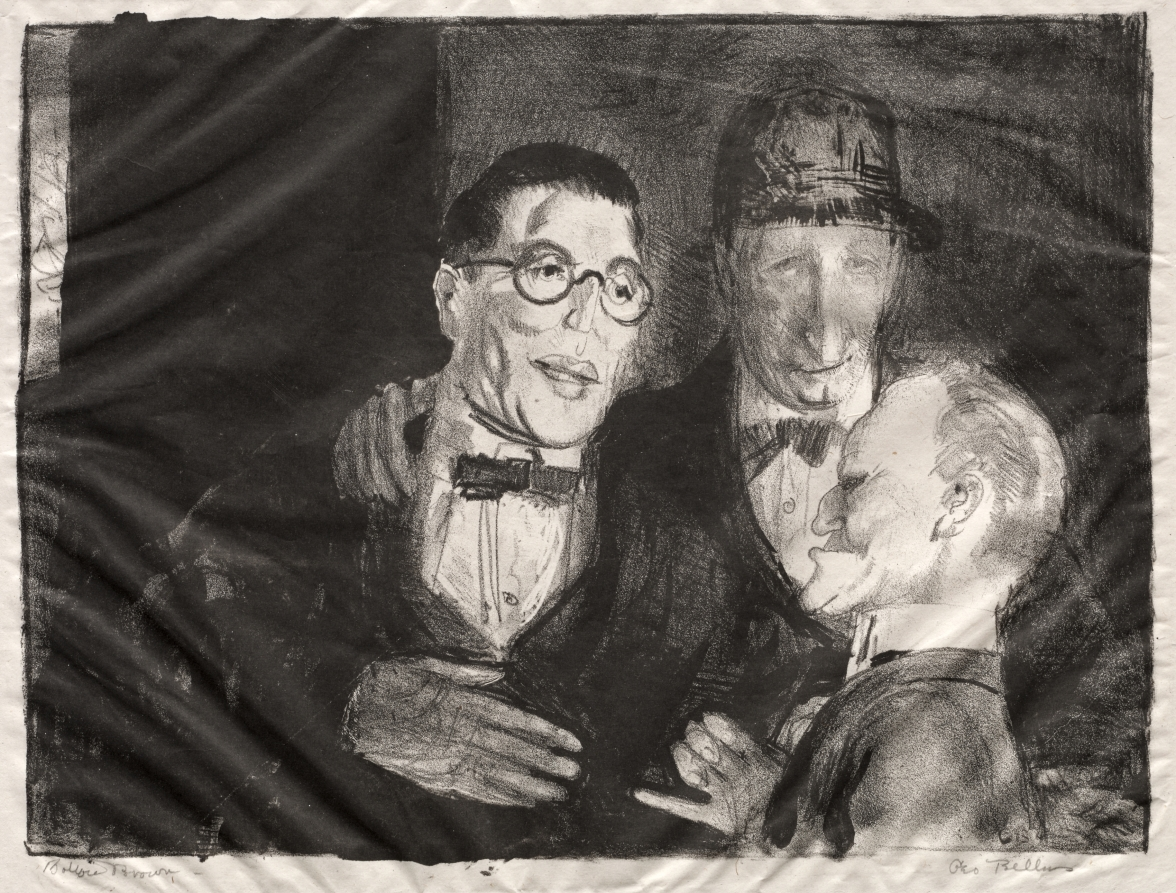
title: Speicher, Kroll and Bellows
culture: America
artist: George Bellows (American, 1882–1925)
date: 1921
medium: lithograph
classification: Print